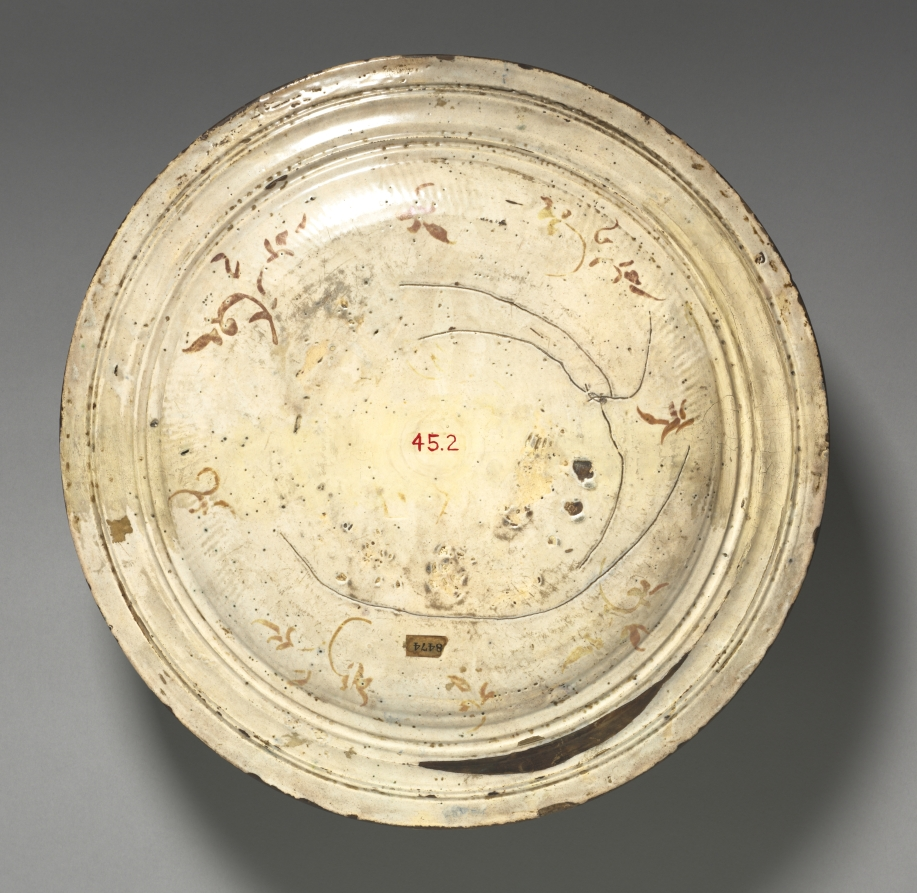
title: Charger Depicting the Three Graces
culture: Italy, Urbino region, Gubbio, 16th century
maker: circle of Maestro Giorgio Andreoli (Italian, 1465?–1553)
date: c. 1525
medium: tin-glazed earthenware with gold lustre (maiolica)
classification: Ceramic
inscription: this plate has been broken and mended; in the repair, signature and date have disappeared. According to catalogue by A. Darcel and A. Basilewsky (Collection Basilewsky, No. 420) name and date were on the plate.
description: During the Renaissance, an understanding of classical antiquity was perceived to be a sign of social, intellectual, and economic distinction. Scenes from Greco-Roman mythology were prominently featured on maiolica, covering the surface in a style called istoriato (decorated with stories). This depiction of the three graces was likely based on an engraving by the Renaissance printmaker, Marcantonio Raimondi.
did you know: In Greek mythology, the three graces represent the daughters of Zeus who embodied charm, beauty, and creativity.